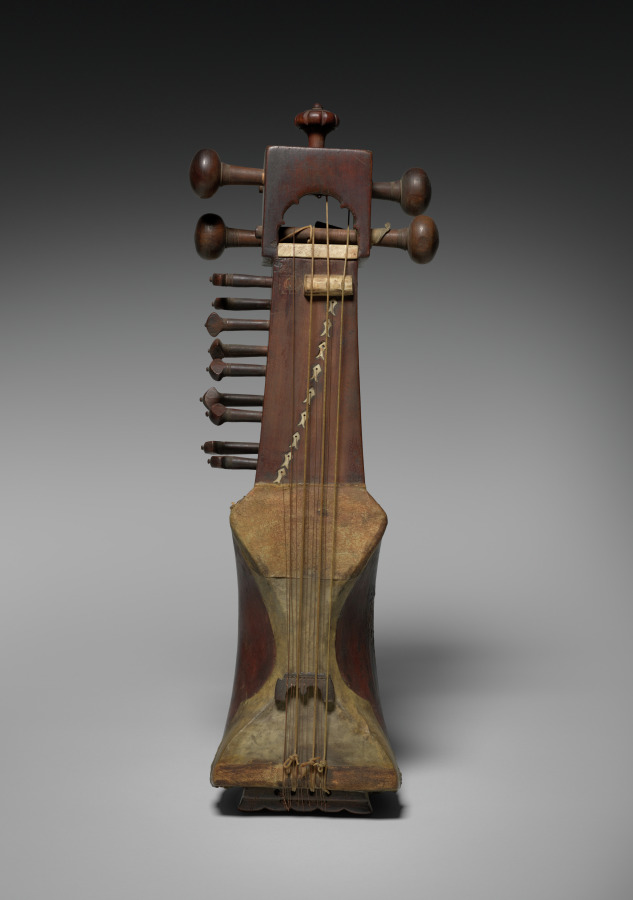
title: Sarangi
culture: East India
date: c. 1850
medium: Wood, parchment, bone or ivory, gut, and copper strings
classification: Musical Instrument